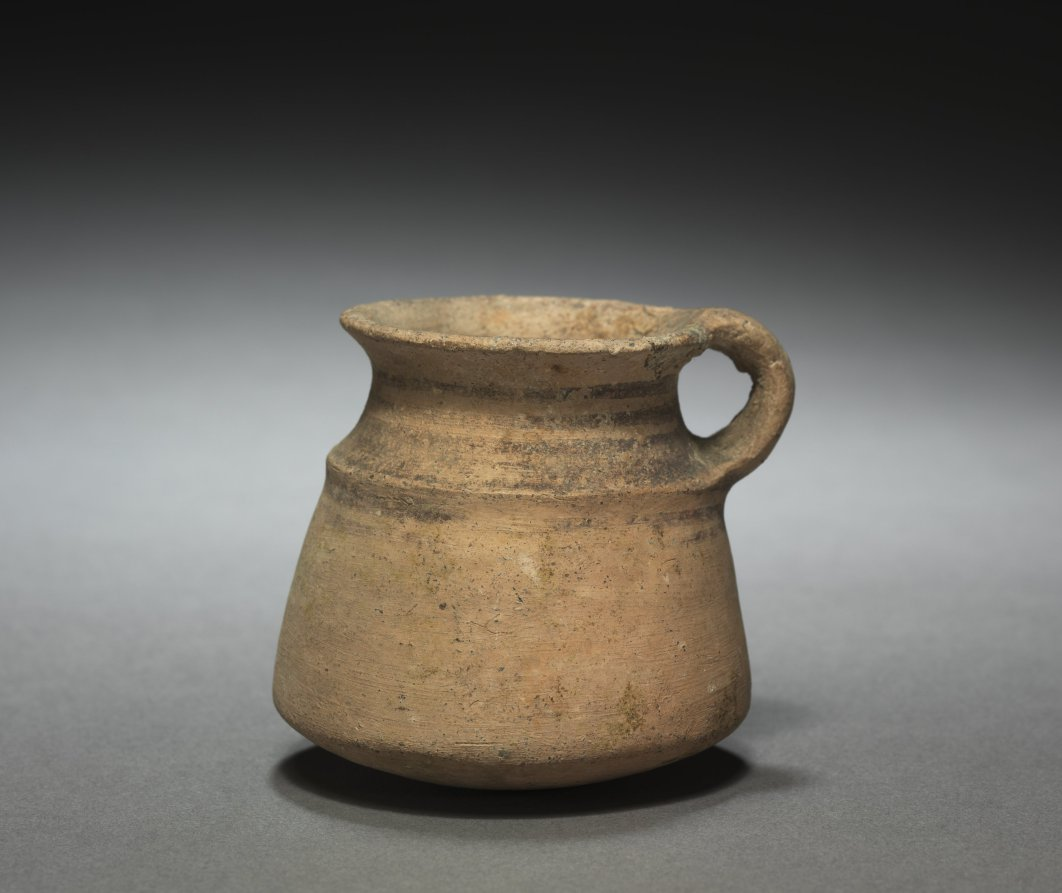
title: Pot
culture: Iran, Luristan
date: 3000–2000 BCE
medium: earthenware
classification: Ceramic